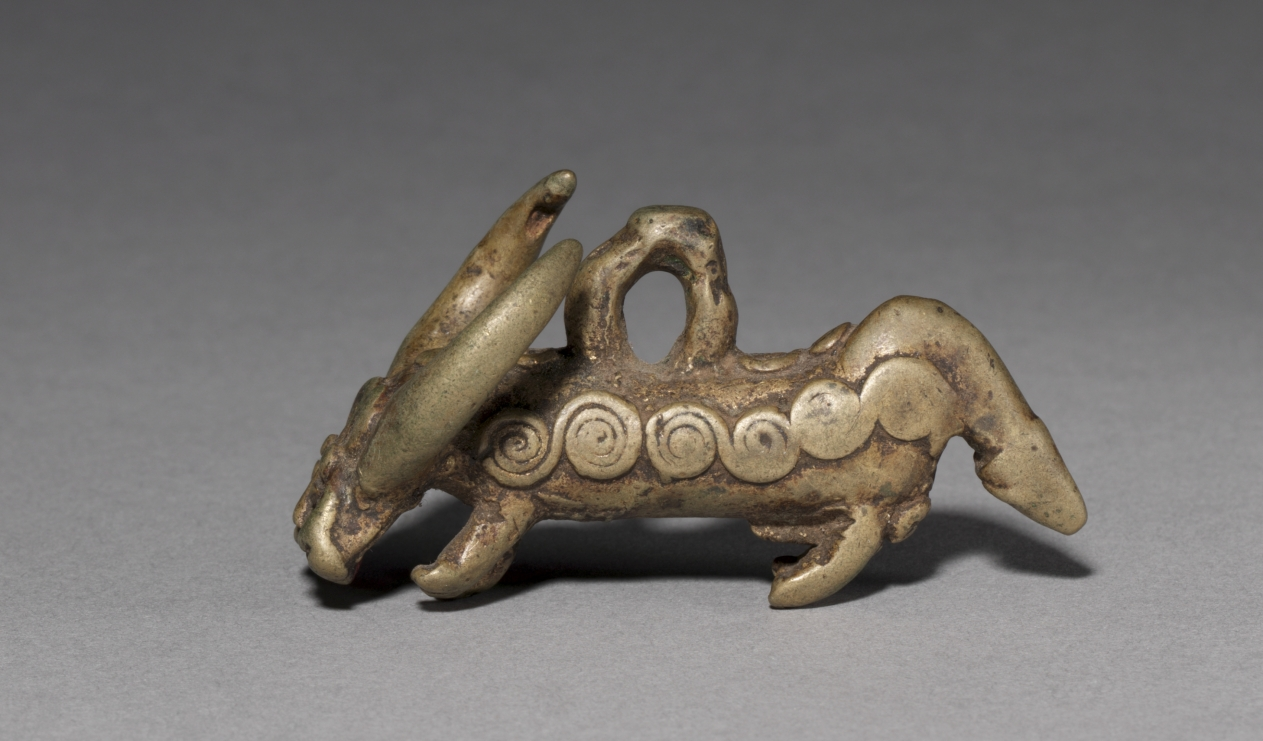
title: Animal Pendant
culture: Western Sudan, Burkina Faso, Tusyan, 20th century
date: 1900s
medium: Copper alloy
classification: Jewelry